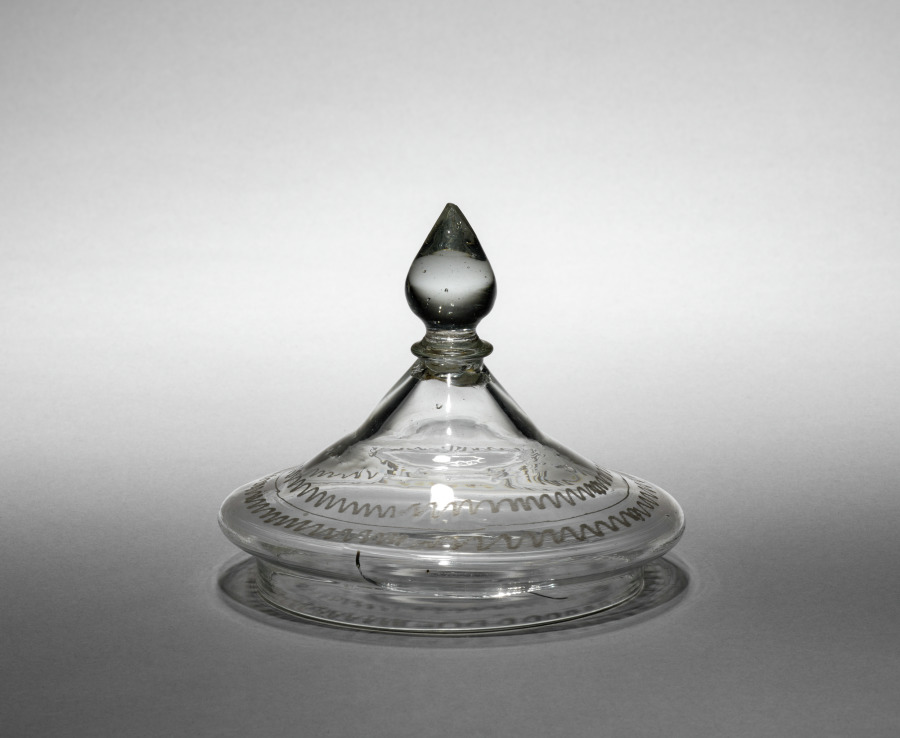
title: Flip Glass (lid)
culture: America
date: late 1700s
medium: glass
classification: Glass